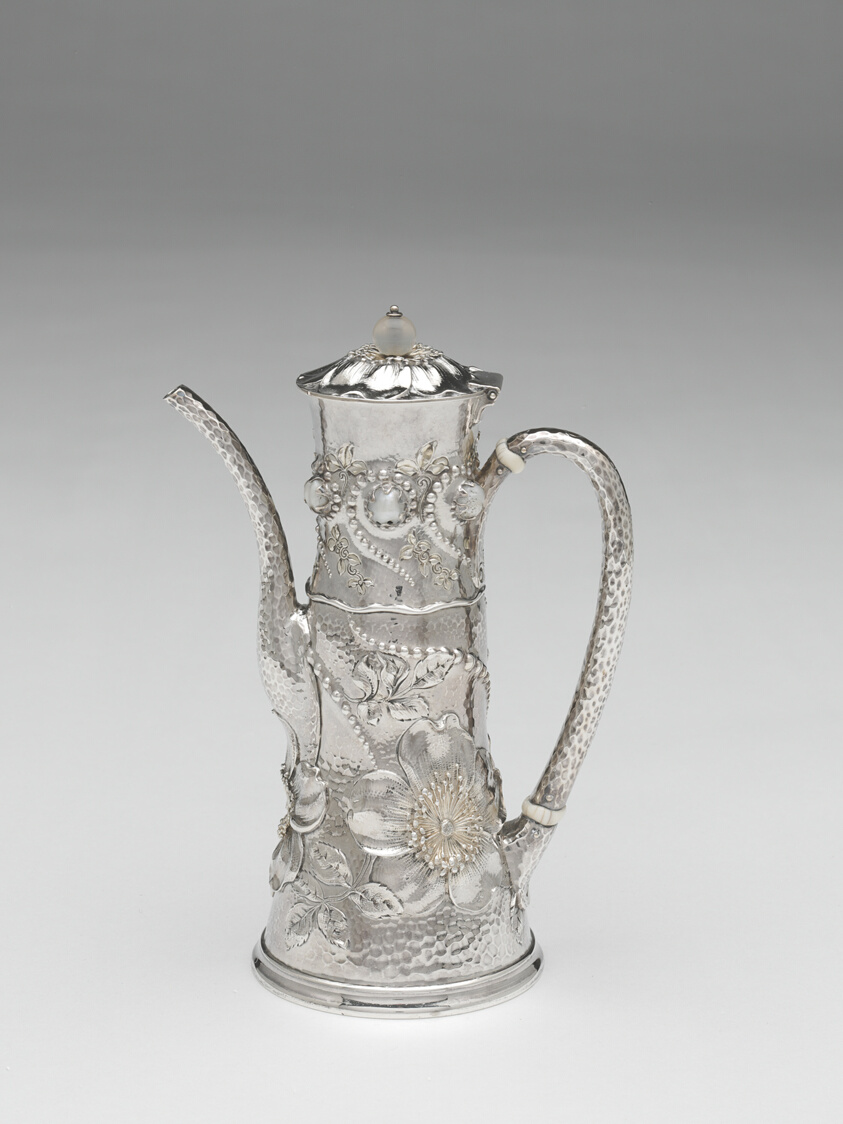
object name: Metalwork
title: Coffee Pot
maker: Design attributed to Charles Osborne (American, 1847–1920); Tiffany and Company (American, founded 1837); New York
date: 1881–89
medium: Silver, pearls, chalcedony, and ivory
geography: New York City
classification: coffeepot; silver; american decorative arts; american arts; decorative arts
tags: dining, drinking